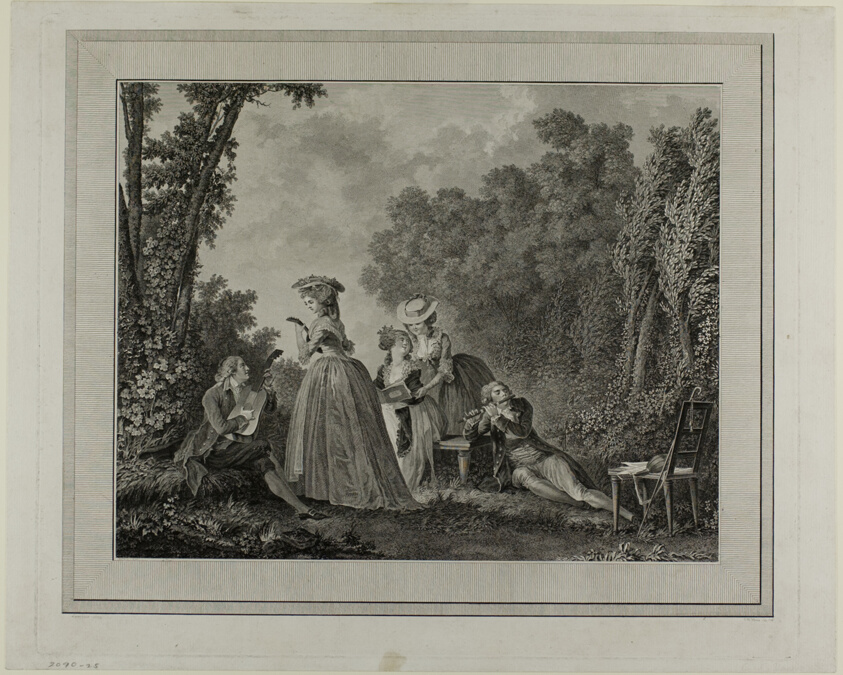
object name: Print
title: The Pleasant Concert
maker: Charles Nicolas Varin (French, 1741-1812); after Nicolas Lavreince (Swedish, 1737-1807)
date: 1789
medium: Engraving with stipple, roulette and etching in black on ivory laid paper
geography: France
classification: engraving; print; prints and drawing